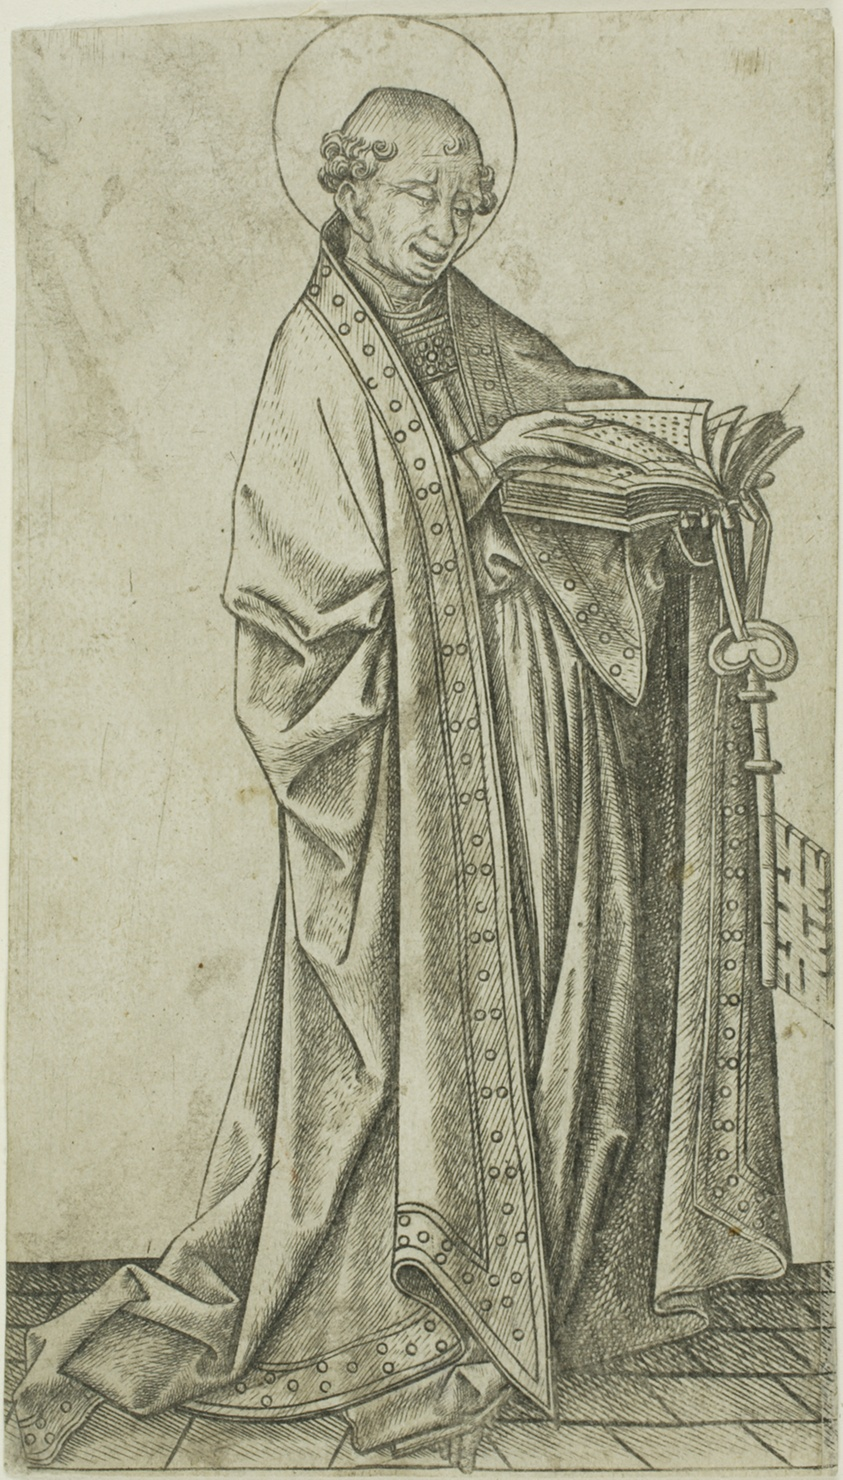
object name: Print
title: St. Peter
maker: Master E. S.; German, active c. 1450-1467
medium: Engraving in black on paper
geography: Germany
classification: engraving; print; prints and drawing